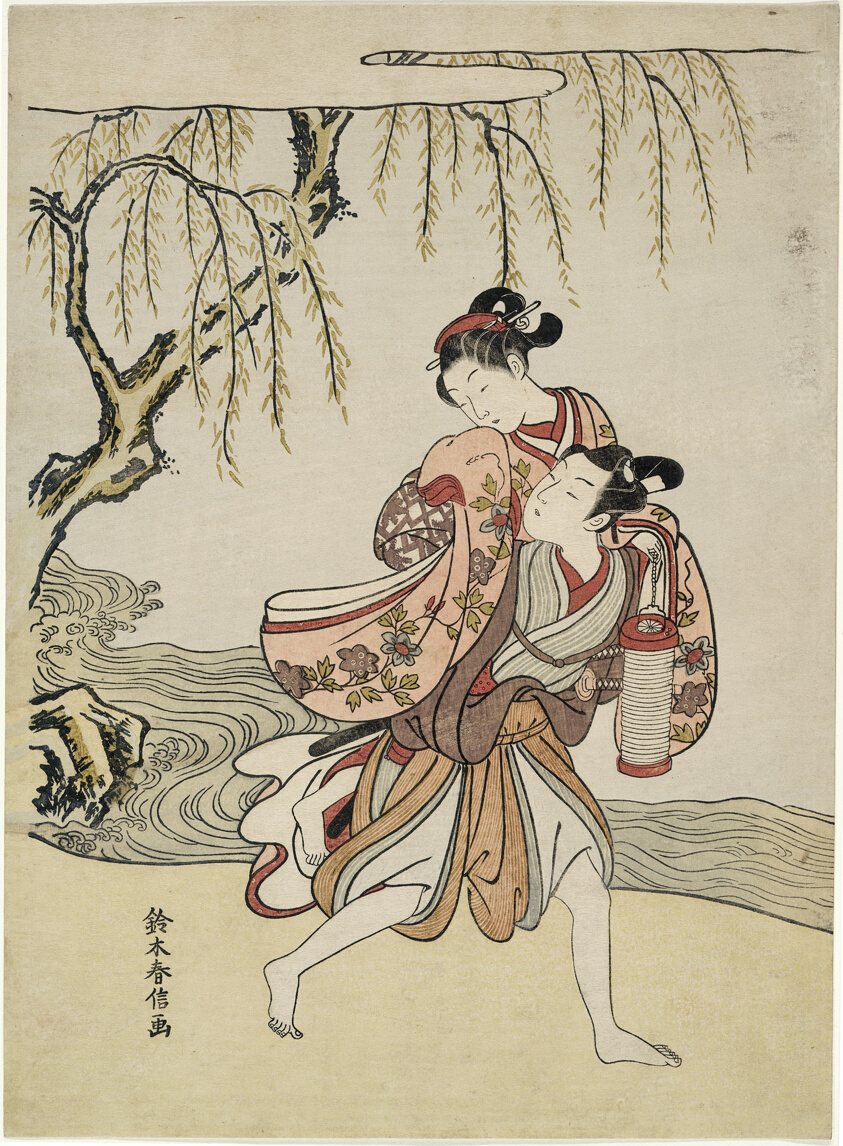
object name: Print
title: The Elopement (parody of Akutagawa episode from "Tales of Ise")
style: Japanese (culture or style)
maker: Suzuki Harunobu 鈴木 春信; Japanese, 1725 (?)-1770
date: c. 1767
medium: Color woodblock print; chuban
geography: Japan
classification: woodblock print; print; asian art